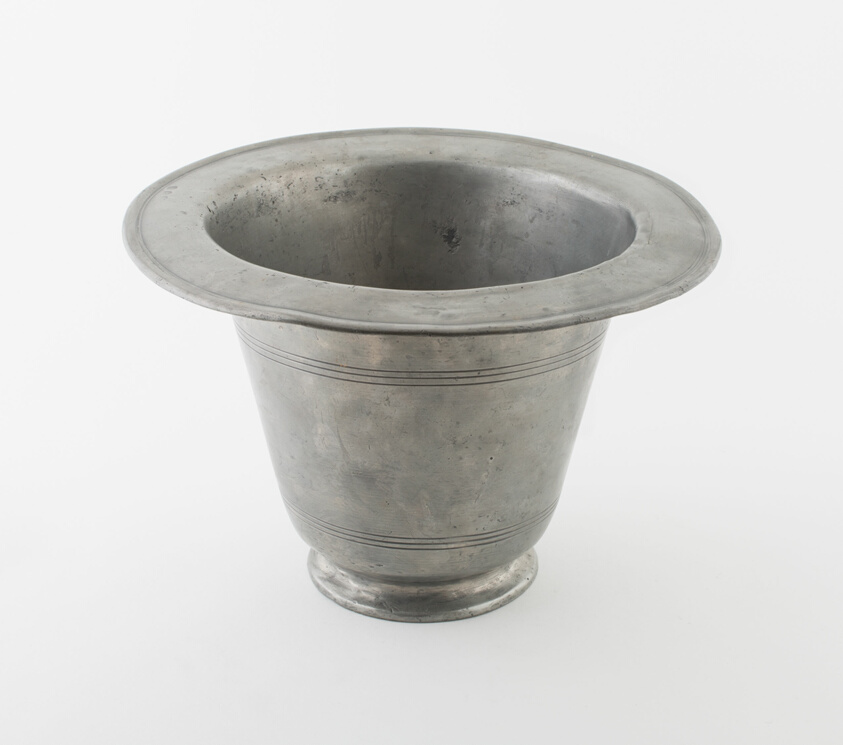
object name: Metalwork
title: Commode Pot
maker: Birch and Villers (John Birch and William Villers); England, active c. 1775-1820; Birmingham, England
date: c. 1780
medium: Pewter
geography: England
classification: chamber pot; pewter; metalwork; european decorative arts